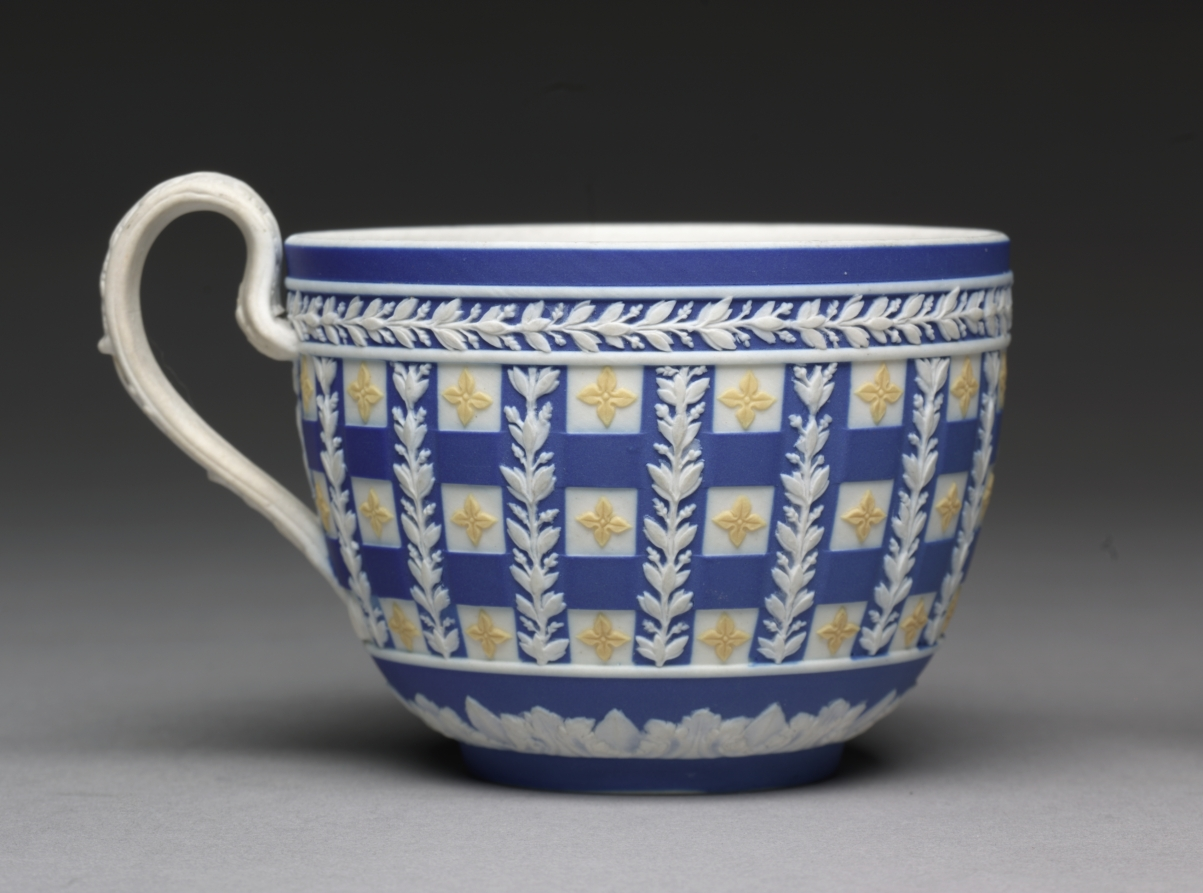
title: Saucer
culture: England, Staffordshire, 18th century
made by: Wedgwood Factory (British)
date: c. 1784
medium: jasper ware with relief decoration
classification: Ceramic